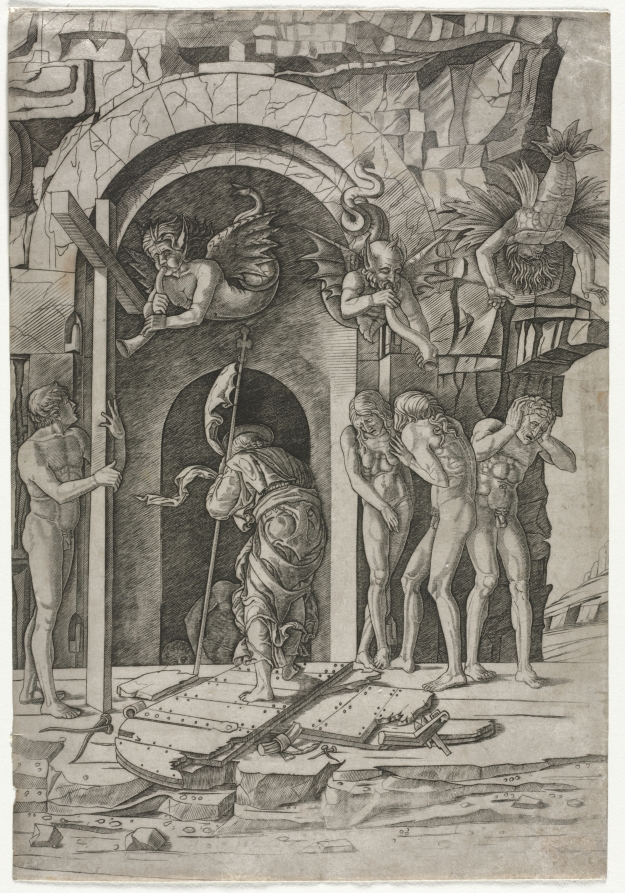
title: Descent into Limbo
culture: Italy, 15th century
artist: Giovanni Antonio da Brescia (Italian)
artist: after Andrea Mantegna (Italian, about 1431–1506)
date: c. 1490–1500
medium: engraving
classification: Print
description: This subject, also known as the Harrowing of Hell, recounts Christ’s descent into limbo, the first circle of hell, to liberate the souls of Old Testament saints. The church taught that those who lived and died in an era without the Christian sacraments were relegated to a lower place until Christ could come redeem them. Here Christ, holding the banner of the Resurrection, enters through a doorway. Broken from its hinges, the door has fallen to the ground over which Christ triumphantly walks. A group of figures await their redemption, including Adam and Eve to the right. Above, a group of demons emerge from the cavern, sounding trumpets to announce Christ’s arrival.